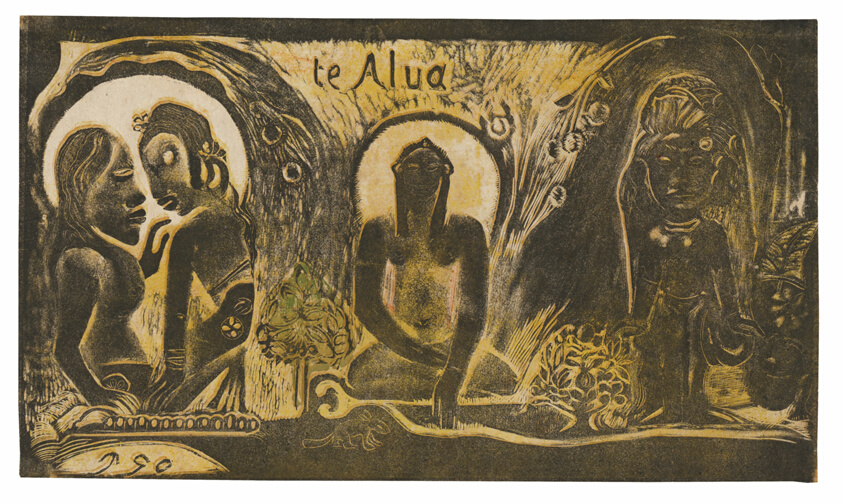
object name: Print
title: Te atua (The God) from the Noa Noa Suite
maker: Paul Gauguin (French, 1848-1903)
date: 1893/94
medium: Wood-block print, printed twice in yellow ocher and black inks, over yellow ink tone block, and transferred golden-yellow, green, red-orange, and red oil-based media, some containing beeswax and conifer resin (probably pine resin), on cream Japanese paper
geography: France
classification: woodcut; print; prints and drawing